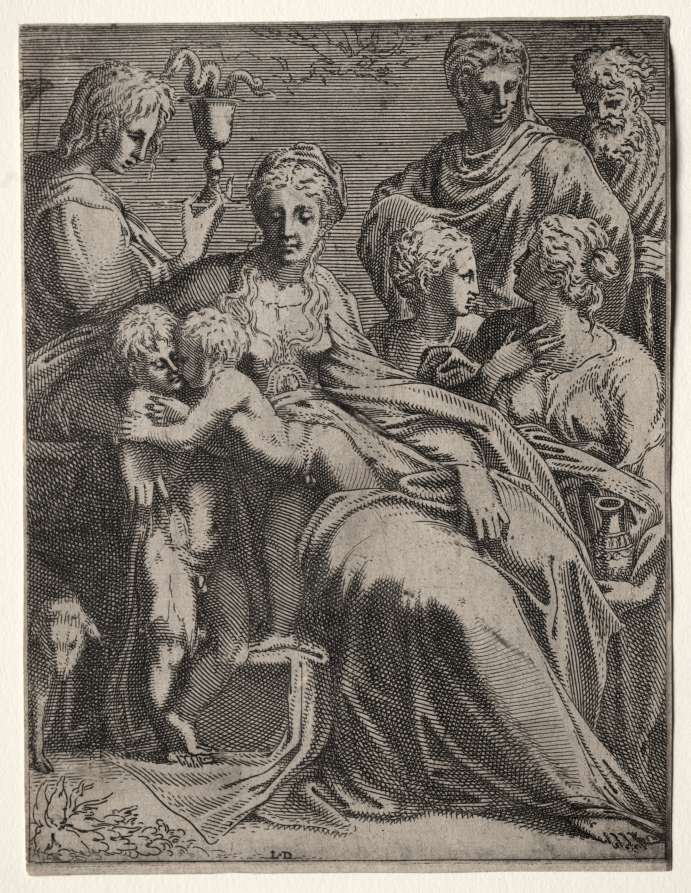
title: Sacred Conversation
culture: France, 16th century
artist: Léon Davent (French)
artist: after Parmigianino (Italian, 1503–1540)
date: 1540s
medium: etching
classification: Print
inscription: inscribed, lower center: artist's initials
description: This etching shows the Virgin and Child with St. John the Baptist, St. John the Evangelist, Mary Magdalene, Joseph, and other two saints. This composition after a now-lost work by Parmigianino was frequently reproduced in early prints and drawings made in France in the 1540s.